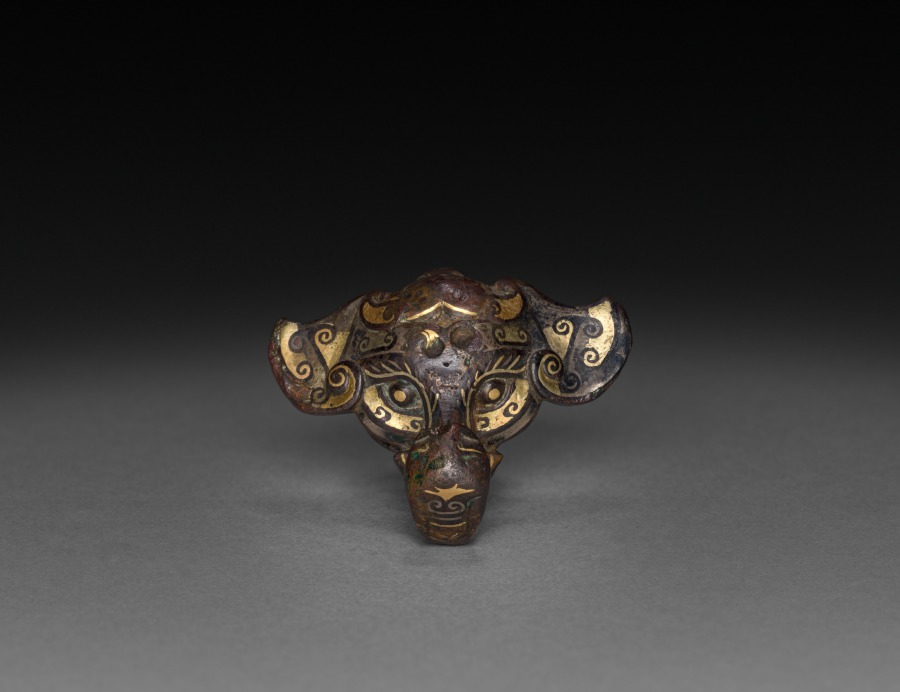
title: Belt Hook (Daigou) in the Form of a Buffalo or Elephant Head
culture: China, Eastern Zhou dynasty (770–256 BCE), Warring States period (475–221 BCE)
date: c. 481–400 BCE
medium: bronze with silver inlay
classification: Metalwork